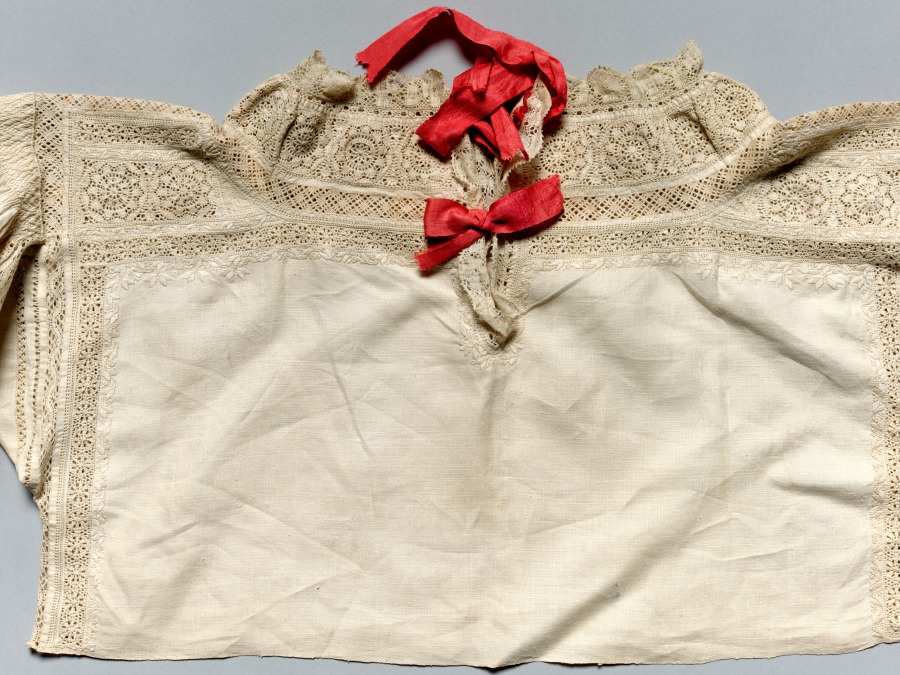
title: Linen Blouse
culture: Hungary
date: early 1900s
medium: linen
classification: Garment